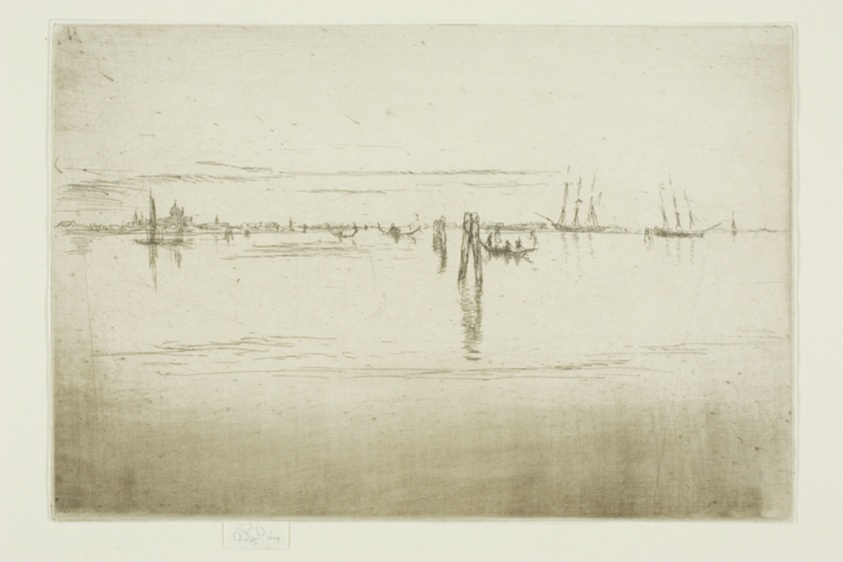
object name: Print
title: Long Lagoon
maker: James McNeill Whistler (American, 1834-1903)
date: 1879/80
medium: Etching and drypoint with foul biting in black ink on off-white laid paper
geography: United States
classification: etching; drypoint; foul biting; print; prints and drawing; paper